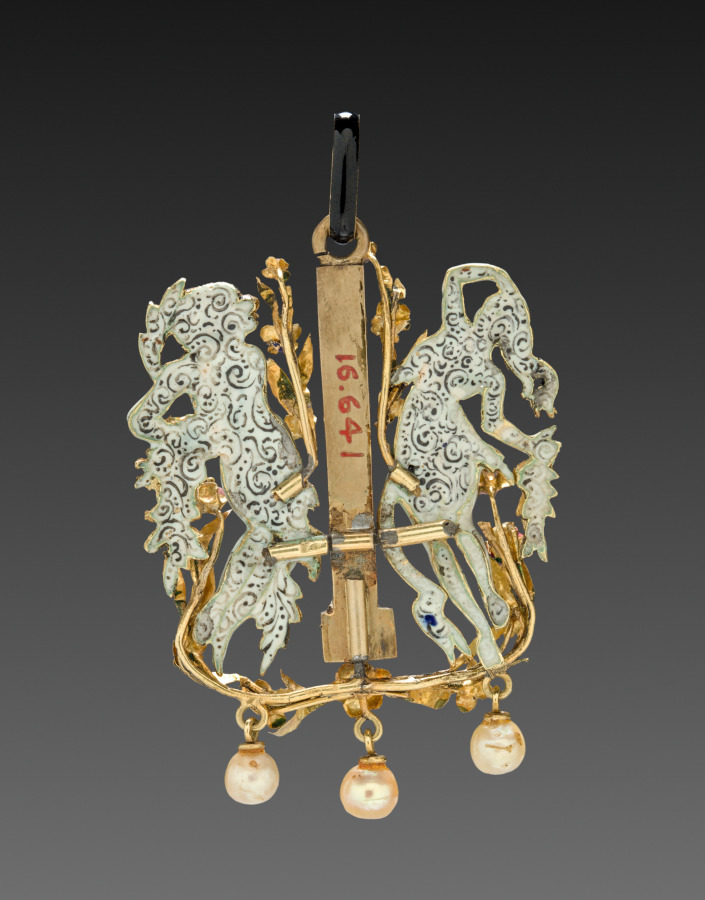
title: Pendant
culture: France, late 19th century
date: 1870–1890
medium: enameled figures surrounded by colored enameled flowers, gems and pearls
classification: Jewelry